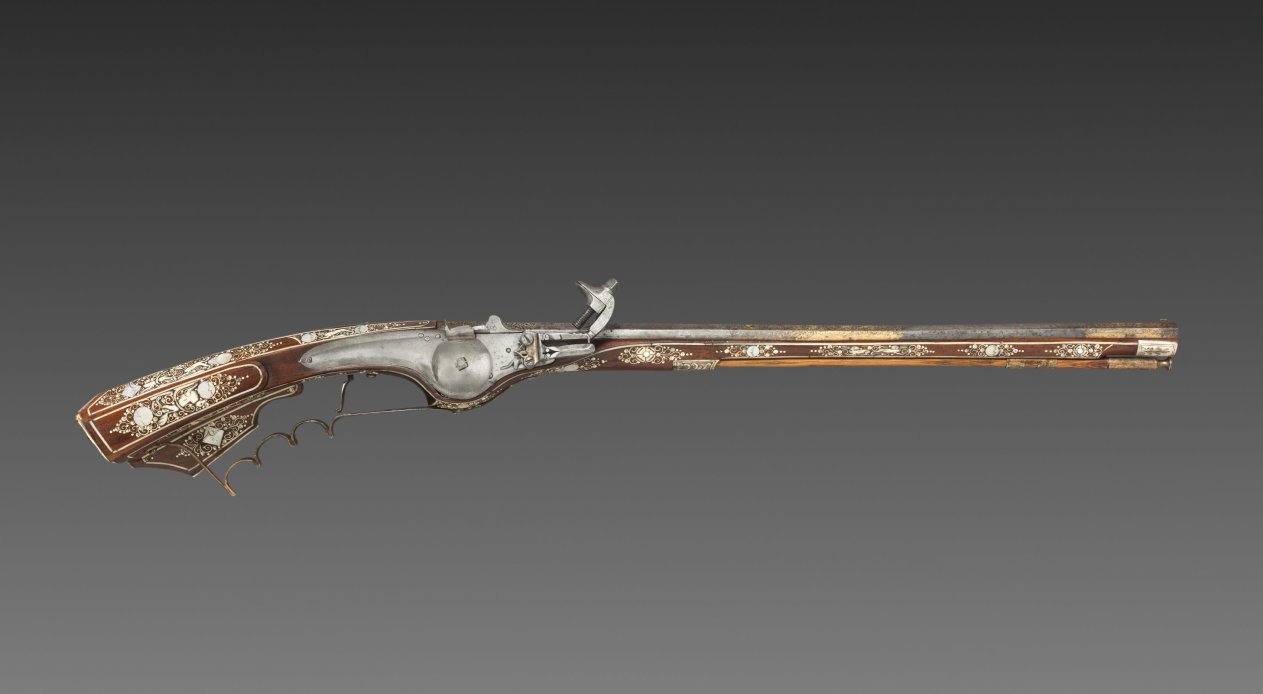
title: Wheel-lock Petronel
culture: Silesia (Southwestern Poland), Teschen, 17th century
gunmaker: Georg Kurland (Polish)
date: c. 1630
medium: steel, gilding, and wood inlaid with elk horn, ivory, and mother-of-pearl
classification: Arms and Armor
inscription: Georg Kurland (signed)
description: A petronel was a type of long pistol made with a wheel-lock ignition. Despite its length, the petronel was fired at the wrist like a pistol and not at the shoulder like a rifle. They were generally made in pairs during the early 1600s. Civilian versions were elaborately decorated for aristocratic clients.